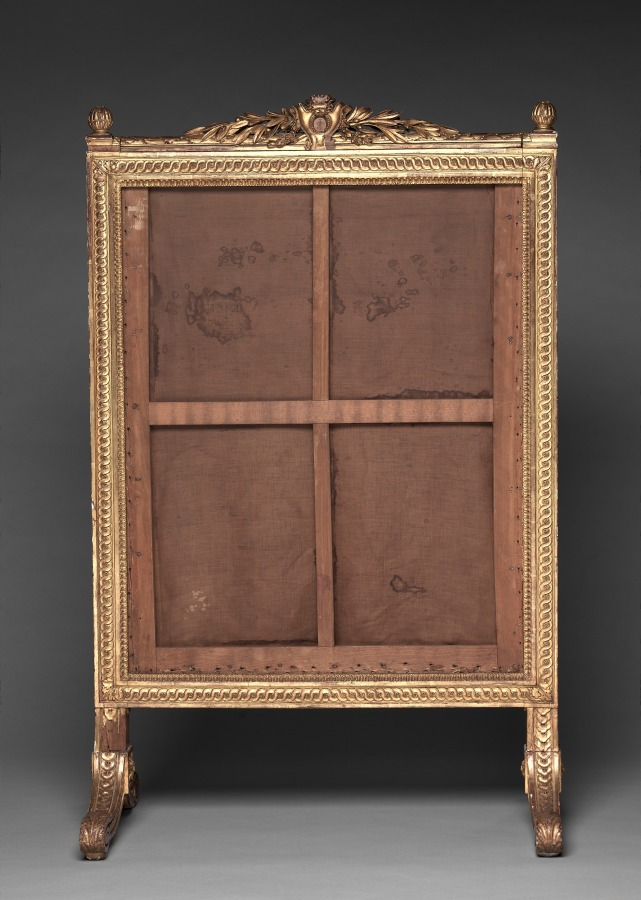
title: Fire Screen (Écran de Cheminée) and Textile Panels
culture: France, Paris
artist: Georges Jacob (French, 1739–1814)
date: c. 1780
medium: gilt wood, upholstery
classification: Furniture and woodwork